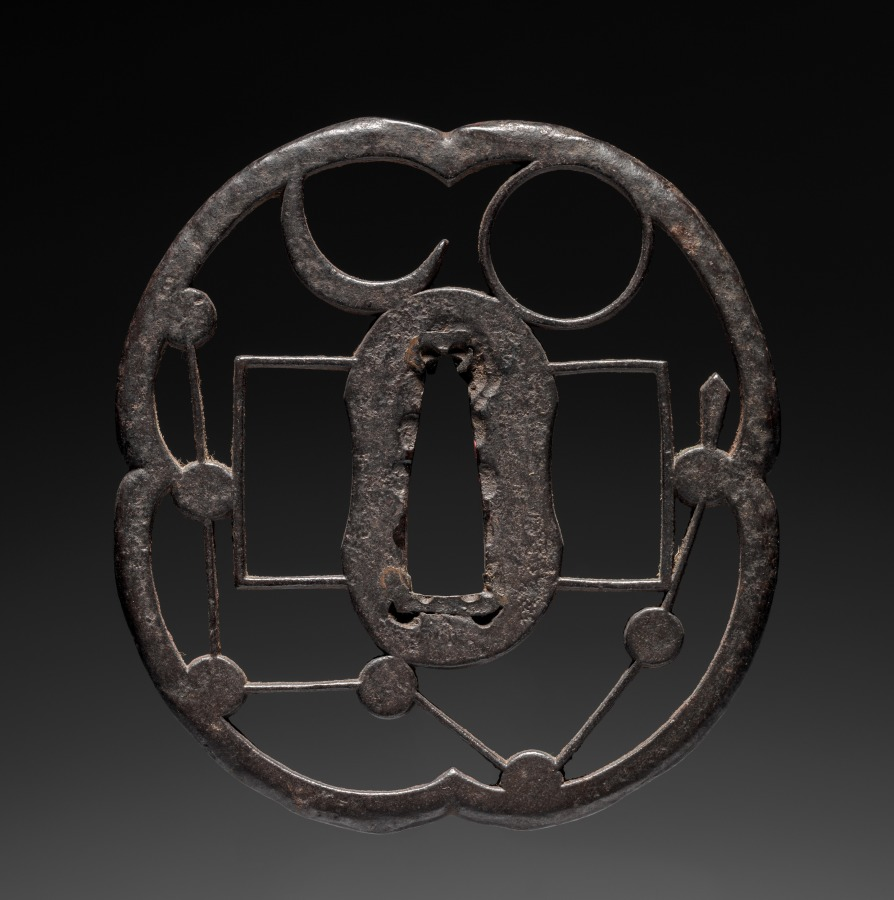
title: Sword Guard (Tsuba) with Sun, Moon, and Northern Dipper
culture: Japan, possibly Edo period (1615-1868)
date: c. 1615–1868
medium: iron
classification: Arms and Armor